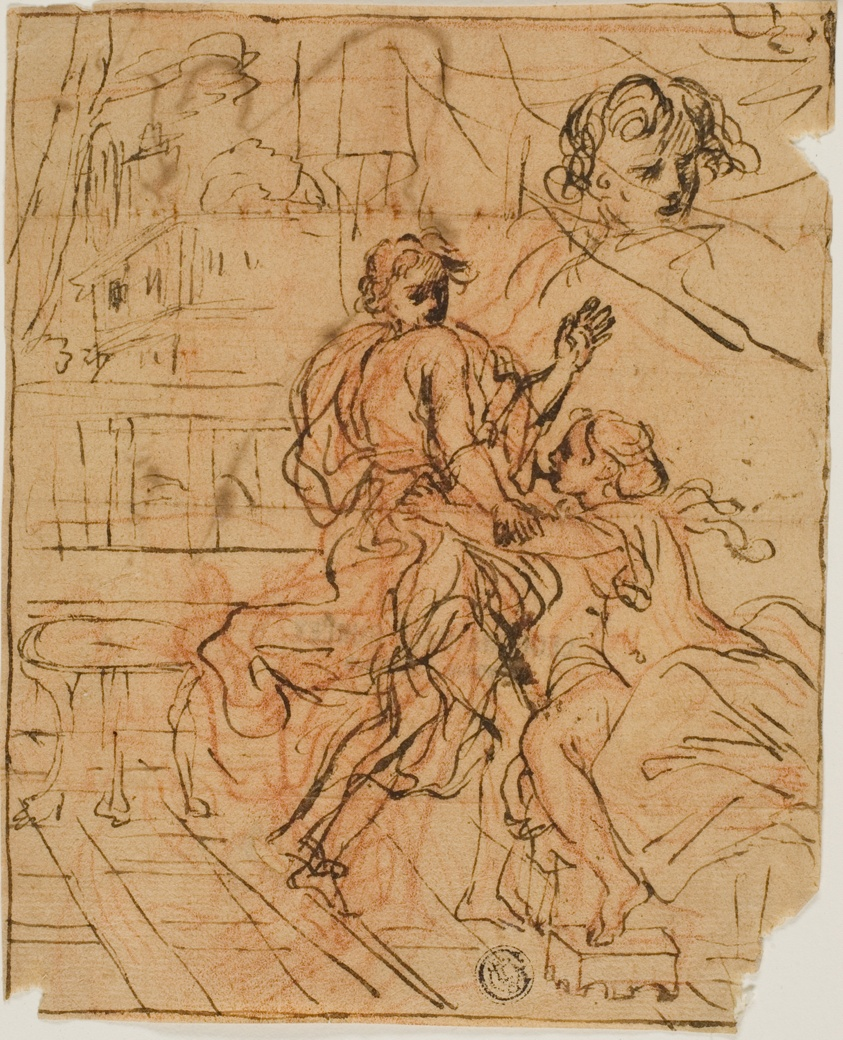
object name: Drawing and Watercolor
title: Joseph and Potiphar's Wife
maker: Possibly Giuseppe Passeri (Italian, 1654-1714); or Giacinto Calandrucci (Italian, 1646-1707)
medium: Pen and brown ink, over red chalk, on tan laid paper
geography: Italy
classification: pen and ink drawings; drawings (visual works); prints and drawing